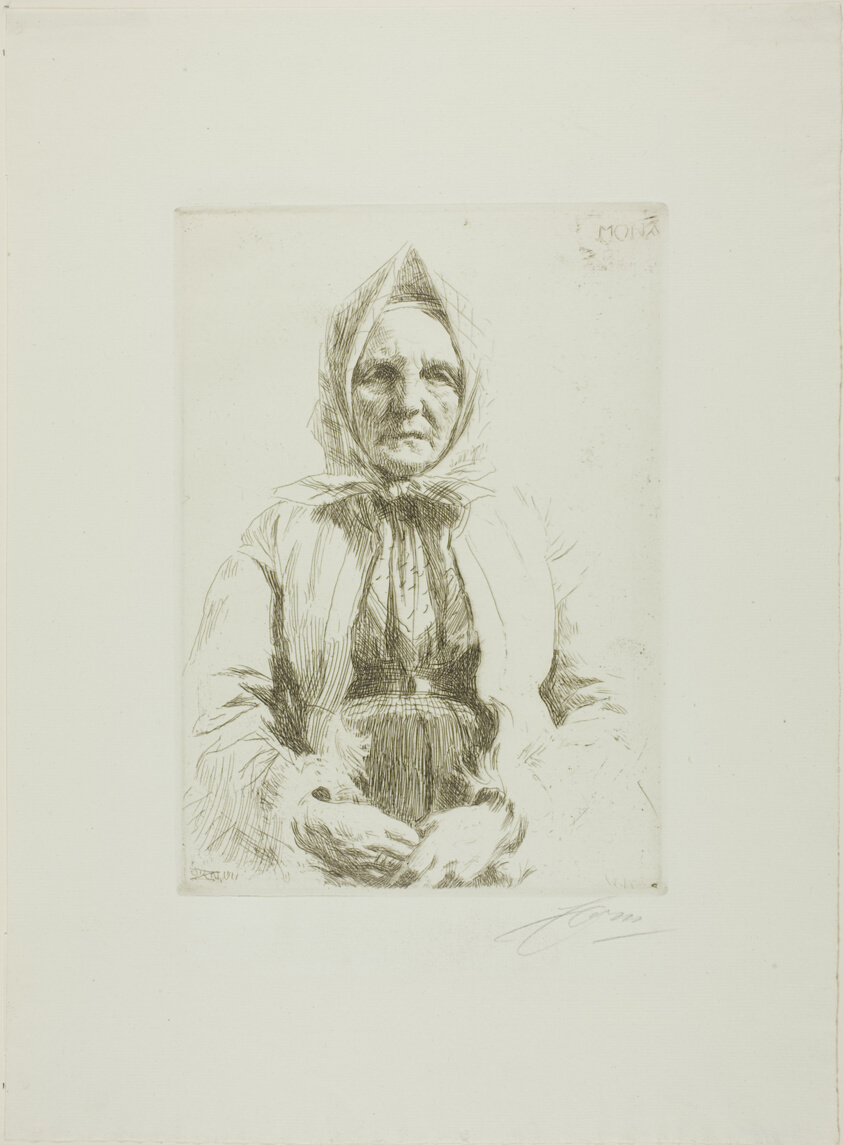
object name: Print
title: Mona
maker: Anders Zorn (Swedish, 1860-1920)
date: 1911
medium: Etching on ivory laid paper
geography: Sweden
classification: etching; print; prints and drawing